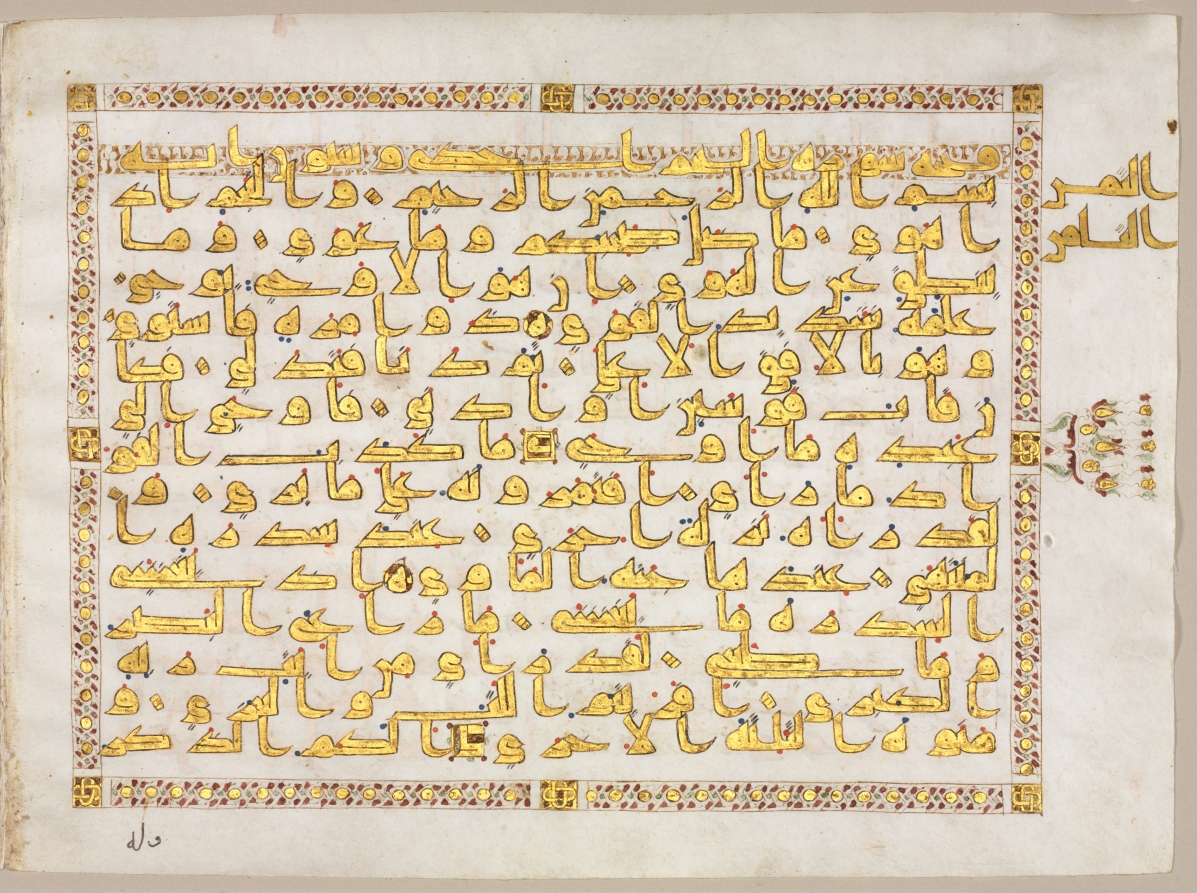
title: Page from a Qur'an (verso)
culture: North Africa, Aghlabid or Abbasid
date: 800s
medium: gold, ink and colors on parchment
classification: Manuscript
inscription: Sura al-Najm (53: 1-part 21). Kufi (fifteen lines to a page)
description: Because of its connection with the Qur'an, calligraphy was elevated above all other art forms in the Islamic world. From an awkward and nearly illegible form of writing, Arabic script was transformed during the 600s and 700s to make it worthy of recording the divine word. By the 800s, Muslim scribes were producing copies of the Qur'an that were true calligraphic masterpieces. This Qur'an, written entirely in gold, exemplifies the angular form of writing known as Kufic at its majestic best. The text is the opening of the Chapter of the Star (53:1–21), which begins: "By the star when it plunges, your comrade is not astray, neither errs, nor speaks he out of caprice. This is naught but a revelation revealed, taught him by one terrible in power, very strong. . . ."